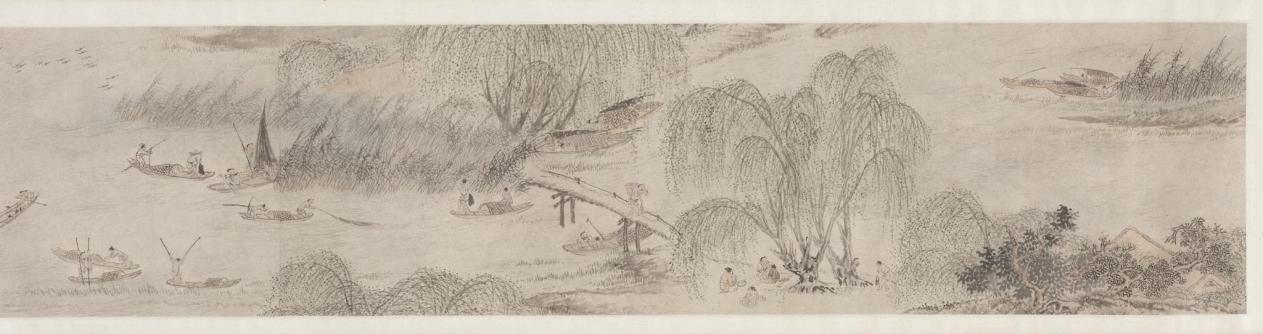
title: Fisherman's Joy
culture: China, Ming dynasty (1368–1644)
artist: Qian Gu (Chinese, 1508–c. 1578)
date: 1572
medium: Handscroll; ink and light color on paper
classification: Painting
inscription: Artist's inscription, signature, and seal: On the autumn day of the jen-shen year [1572], P'eng-ch'eng, Ch'ien Ku painted [this]. [seal] Hsüan-ch'ing shih. 2 colophons, both dated 1689, and 5 additional seals of Yün Shou-p'ing (1633-1690).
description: This painting has a scene showing two small crafts, each manned by two fishermen, practicing a traditional fishing method. In one of them, a man uses a bamboo pole to direct the movements of a cormorant bird sent into the water. Cormorant fishing, witnessed in some areas of the lower Yangzi River, appears in Zhe school paintings. Qian Gu may have borrowed these narrative figure scenes from Zhe school paintings, while his vantage point, brushwork, and soft tones align with the Wu school style. Scenes of fishermen appealed to urban and educated audiences who idealized the self-sufficient independence of fisherfolk.